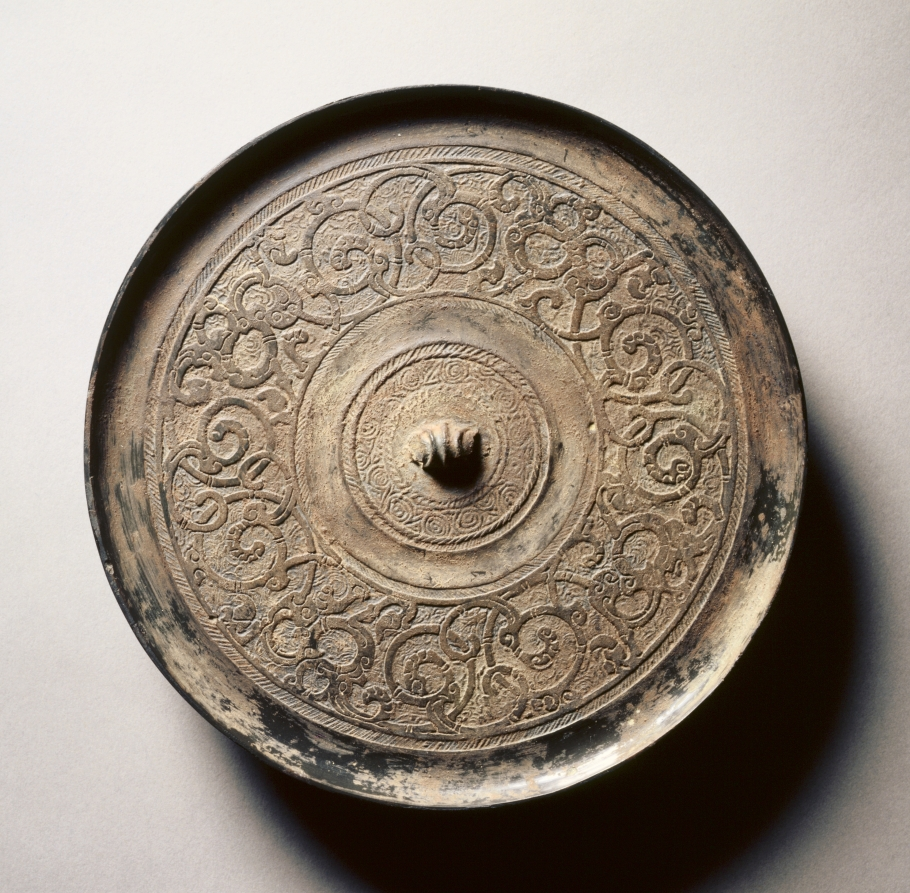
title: Mirror with Serpentine Interlaces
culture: China, Eastern Zhou dynasty (770–256 BCE), Warring States period (475–221 BCE)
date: early 400s–late 200s BCE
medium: bronze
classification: Metalwork